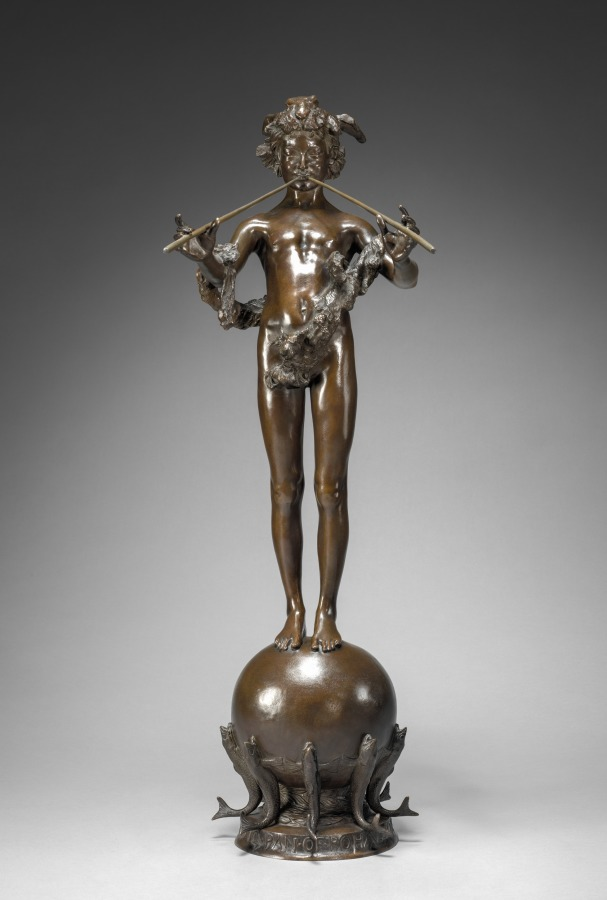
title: Pan of Rohallion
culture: America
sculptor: Frederick William MacMonnies (American, 1863–1937)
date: 1890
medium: bronze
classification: Sculpture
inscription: Signed on globe: Frederick MacMonnies, Paris 1890. © 1894. Inscribed around base: TO PAN OF ROHALLION ANNO DOMINI MDCCCLXL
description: Rohallion in the title refers to the name of an estate in New Jersey, whose owner commissioned MacMonnies to create a large fountain of this design for a garden pool. Later, the artist made several smaller versions, such as this example. Here, the ancient Greek god Pan plays his musical pipes while standing on an orb supported by fish.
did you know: The character of Peter Pan, including his flute playing, references the Greek god Pan.